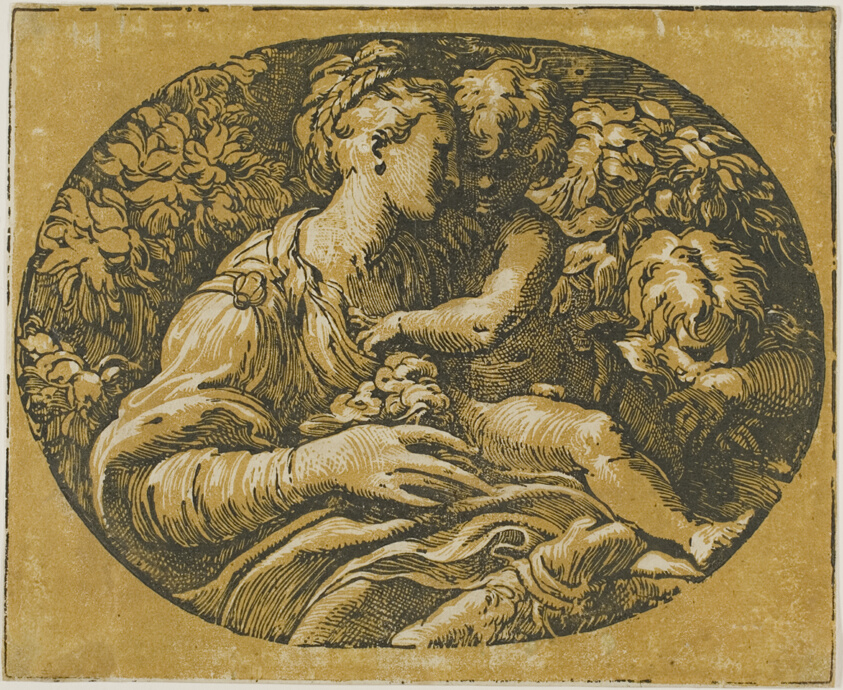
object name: Print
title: The Virgin, Christ Child, and Saint John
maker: Antonio da Trento (Italian, 1510-1550); after Parmigianino (Italian, 1503-1540)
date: 1540/50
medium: Chiaroscuro woodcut printed in black and ochre from two blocks, on paper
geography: Italy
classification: woodcut; print; prints and drawing